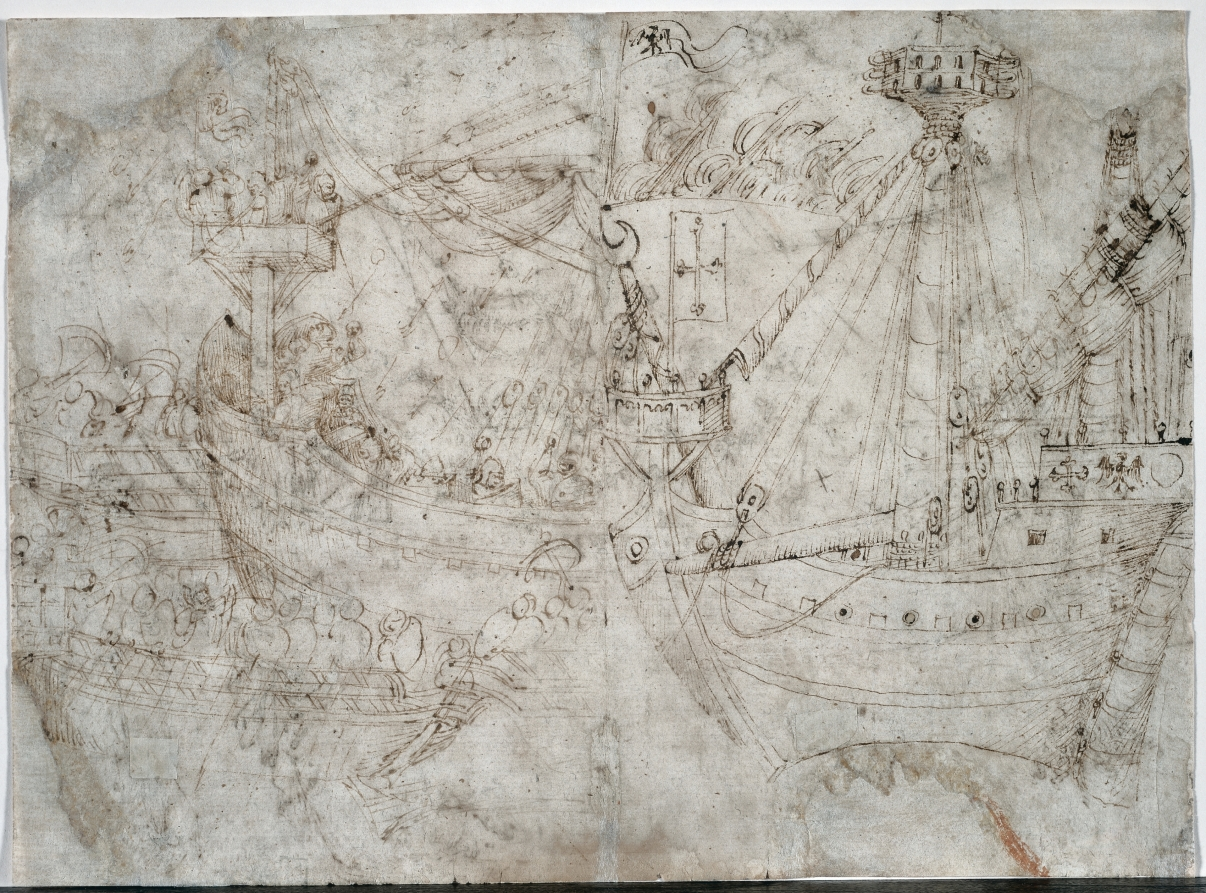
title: Navicella (recto)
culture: Italy, Arezzo, 15th century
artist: Parri Spinelli (Italian, 1387–c. 1453)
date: c. 1410s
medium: pen and brown ink (iron gall)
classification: Drawing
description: Parri Spinelli was most important painter from Arezzo in the early 1300s. About 30 of his drawings are extant, more than for any other artist of the period, when drawing was just beginning to be common to artistic practice. Spinelli used a quill pen and ink on a large sheet of paper to copy the composition of a monumental mosaic by the Florentine artist Giotto that adorned the portico of Old Saint Peter’s Basilica in Rome (since destroyed). In this scene from the Bible, Christ walks on water at right, while Saint Peter kneels before him in front of a ship filled with Christ’s disciples. Spinelli focused on the outlines of the figures, using a limited vocabulary of parallel and perpendicular lines to suggest shallow depth and shadow. Paper was rarely wasted. On the other side of the sheet (1961.38.b), Spinelli continued the copy, rendering two large ships and two rowing boats full of people.The drawing formed part of a model or pattern book that Spinelli would have kept in his studio. The book was broken up, probably as early as the 1500s, and two other drawings with the same subject—in the Metropolitan Museum of Art, New York, and in the Musée Bonnat in Bayonne—are known.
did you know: Dating from the early 1400s, this drawing by Parri Spinelli is the oldest in the Cleveland Museum of Art's collection.